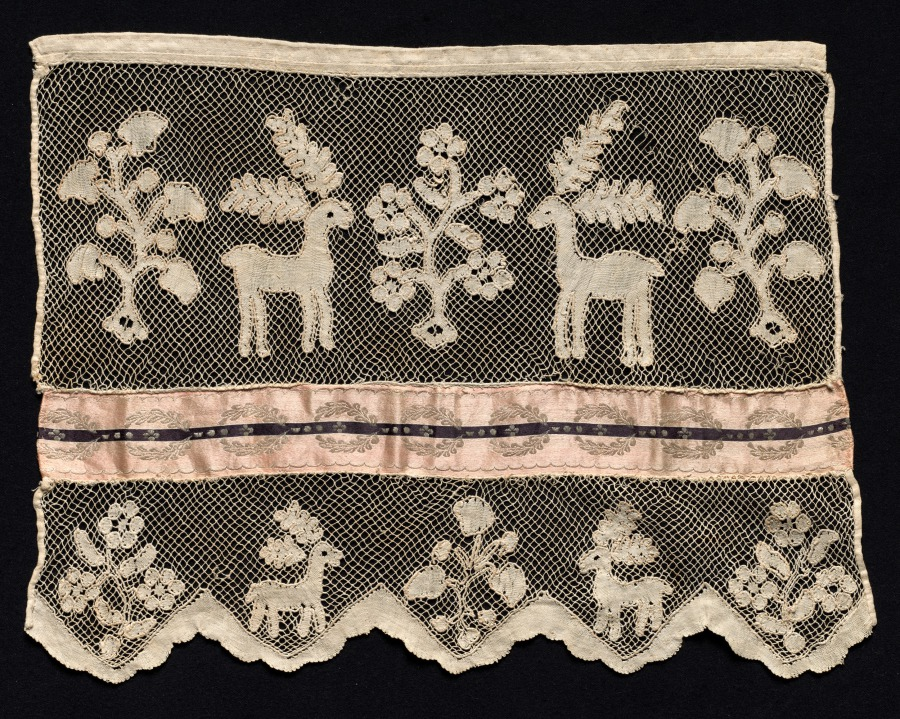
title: Lace Towel End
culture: Russia, Orel province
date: 1700s–1800s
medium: cotton or linen (est.); straight (continuous) bobbin lace; ground with interspersed motifs of plant and animal forms in plain weave outlined with gimp (heavy cord); applied silk (est.) ribbon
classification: Lace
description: This lace was used to embellish a towel end. Textiles of this type are valuable for their lacework depicting ancient folk motifs, ritual significance, exemplification of the role of textiles in Russian society, and connection to a prominent woman collector, Natalia de Shabelsky, without whom this textile and others like it might have been lost.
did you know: Lace making was a common tradition in many cultures because it displayed the skill of the mother or daughter who made the lace.